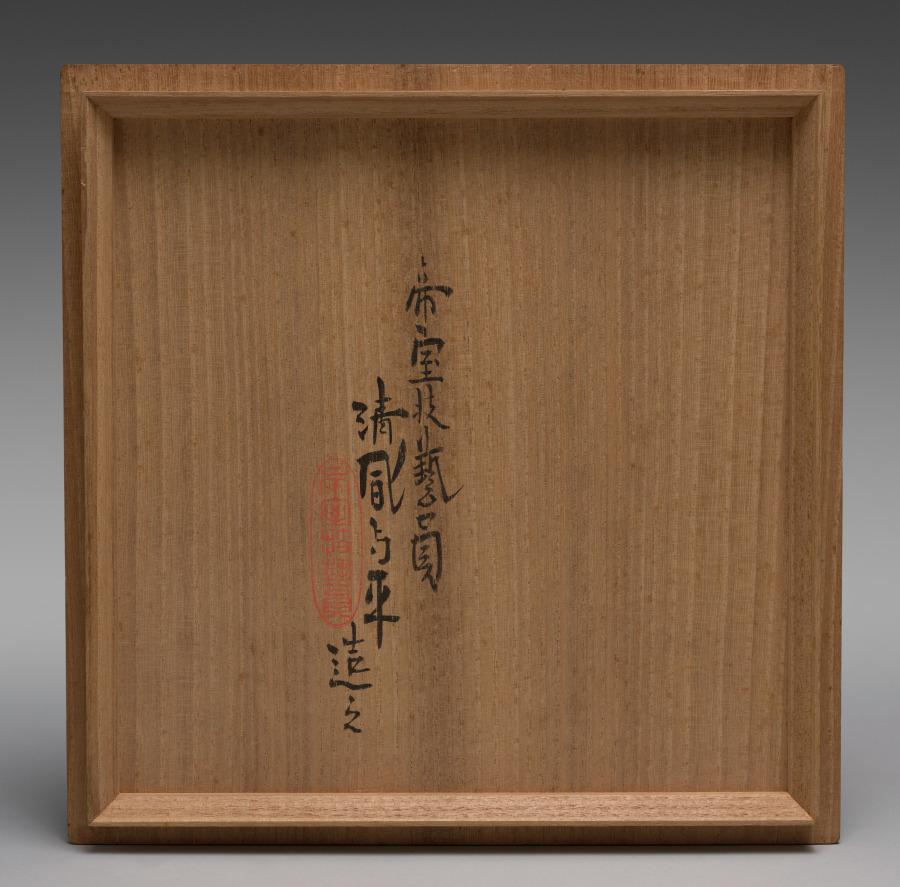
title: Sweets Bowl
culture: Japan, Meiji period (1868–1912)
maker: Seifū Yohei III (Japanese, 1851–1914)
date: 1893–1914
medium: Glazed porcelain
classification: Ceramic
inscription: 清風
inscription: 金聲玉振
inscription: 帝室技芸員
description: Seifū Yohei III was the most prominent head of a ceramics studio in Kyoto that specialized in Chinese-style porcelains and especially items for use in sencha (煎茶), or the drinking of steeped-leaf tea with companions. Sencha was popular among the bunjin of Kyoto and Osaka, who often enjoyed it as part of their emulation of Chinese culture. While sencha was by design less formal than the Japanese tea ceremony, it still featured the display of treasured objects. Prized Chinese antiquities were generally unobtainable, so substitutes such as the Gu-Shaped Flower Vase, CMA 2022.224, were much in demand. Bowls for distributing sweets, like this one, were also a staple of sencha gatherings.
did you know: Names for the glazes, written in ink with a brush on the lids of the custom-made storage boxes for the works, often indicate a specific glaze or ware that had inspired Seifū Yohei III.